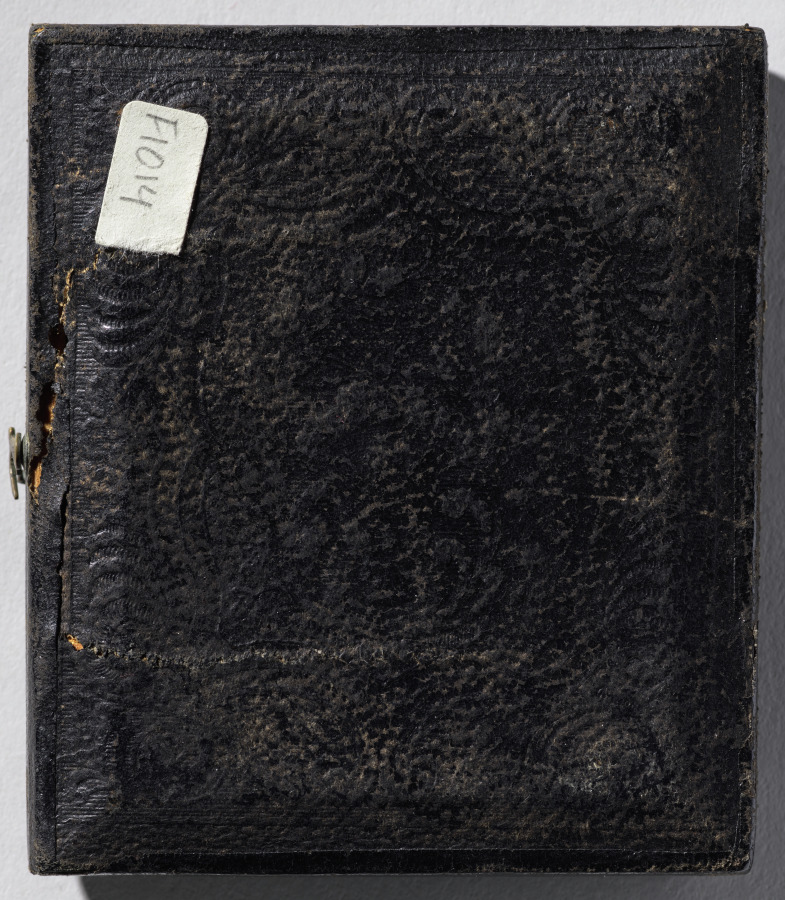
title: Two Oxen and Driver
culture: America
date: 1850s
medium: daguerreotype, sixth plate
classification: Photograph